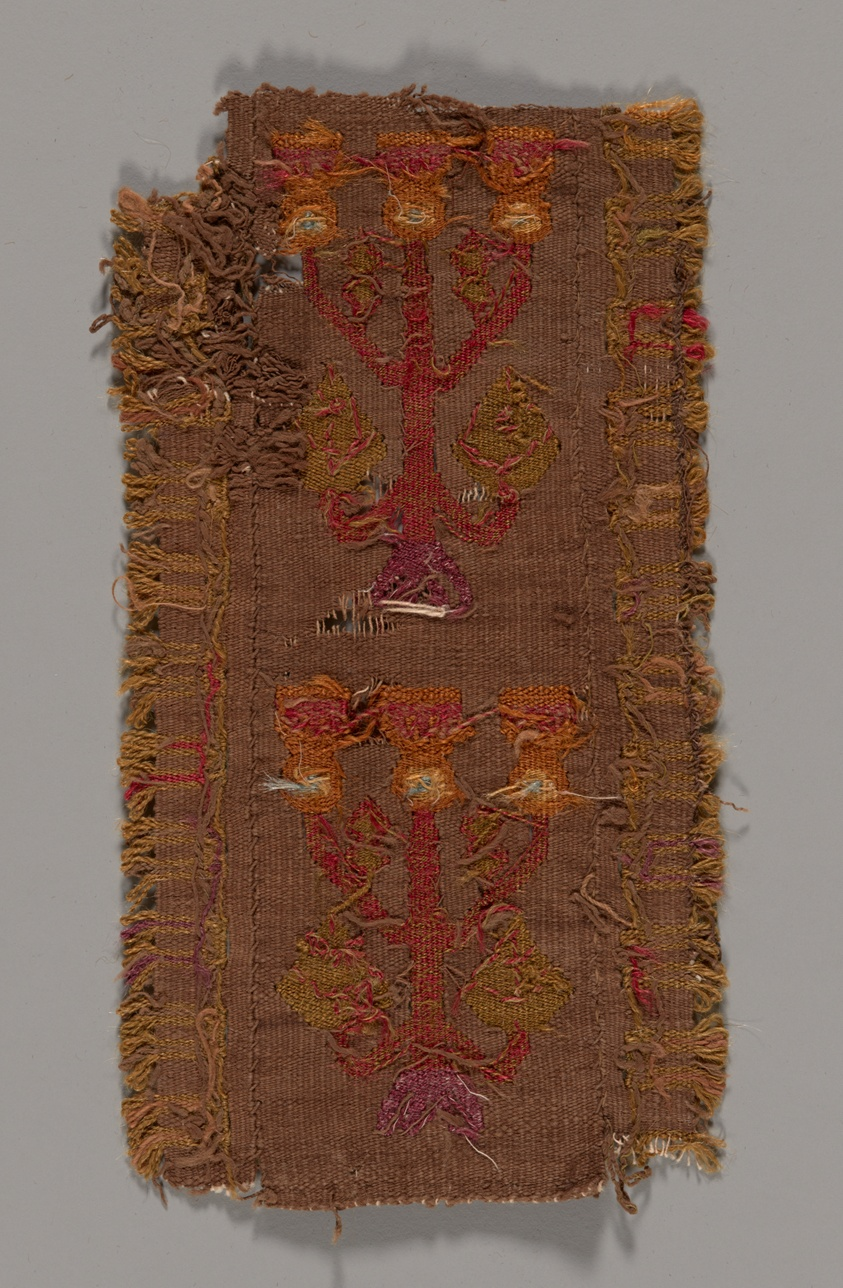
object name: Textile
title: Band Fragments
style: lambayeque, Pre-Columbian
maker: Lambayeque (North coast, Peru)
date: 1000/1476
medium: Cotton and wool (camelid), slit tapestry weave with eccentric wefts, uncut weft loop pile, extended uncut looped and plied weft fringes; embroidered with cotton and wool (camelid) with laid-in couching; and selvage weft loop fringe; three segments joined by overcast couching stitch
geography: Peru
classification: textile; weaving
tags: super/natural